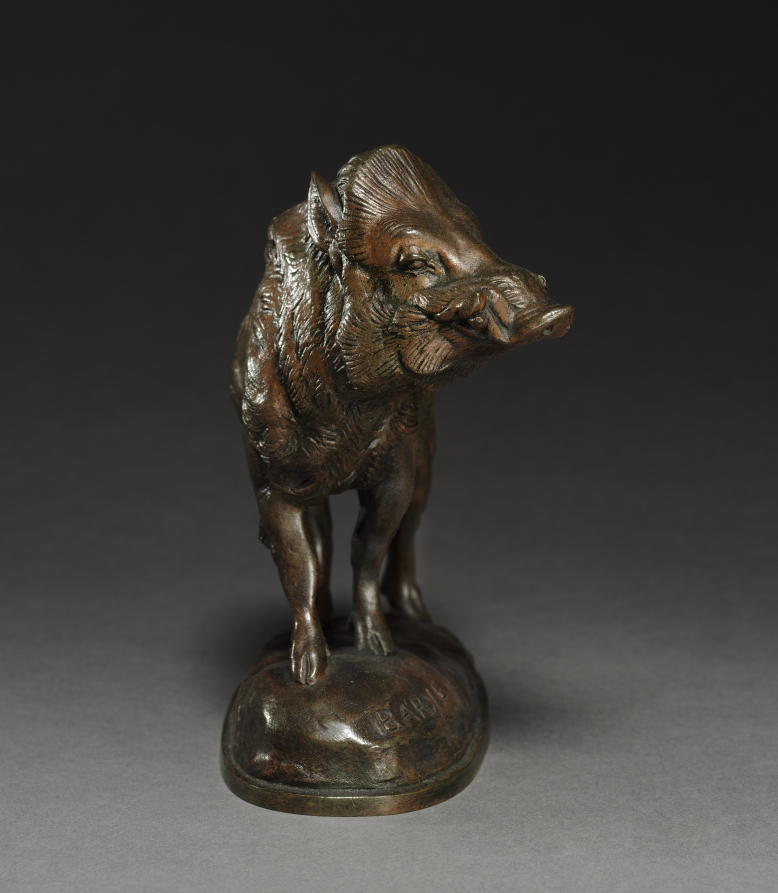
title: Wild Boar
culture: France, 19th century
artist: probably by Antoine-Louis Barye (French, 1796–1875)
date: 19th century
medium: bronze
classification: Sculpture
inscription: Signed" "Barye ALF" (...Foundry(?). On back of base: "C 808", in small letters